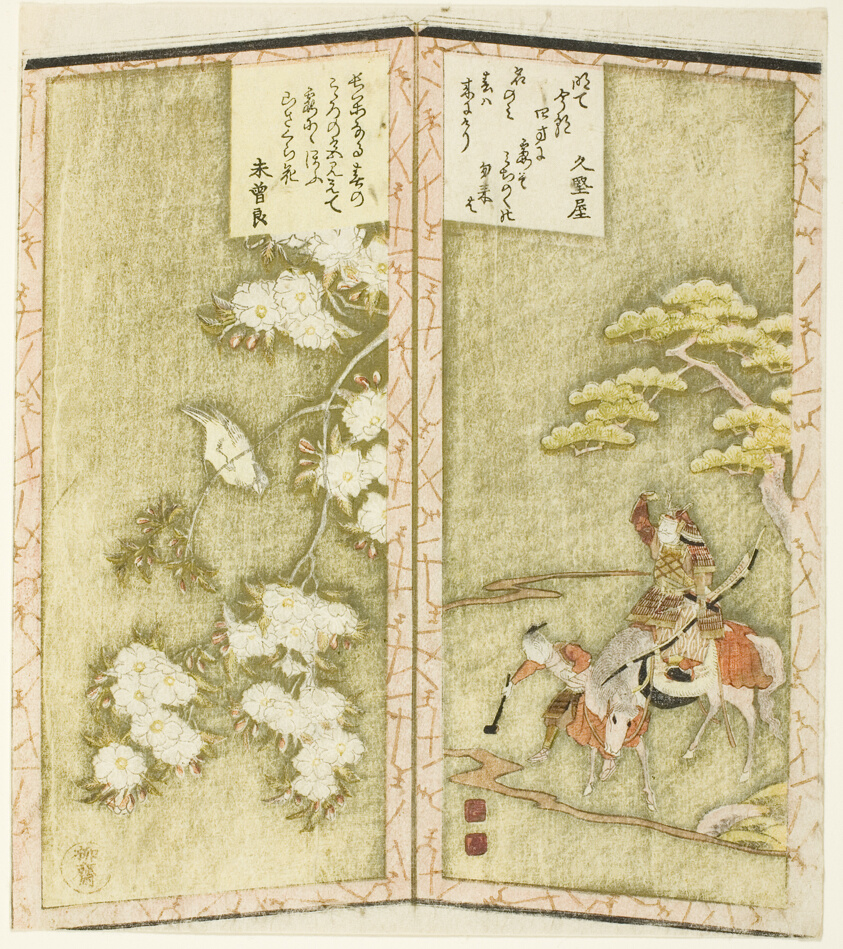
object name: Print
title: Minamoto no Yoshiie on horseback and a bird on a branch, from an untitled hexaptych depicting a pair of folding screens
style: Japanese (culture or style)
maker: Ryuryukyo Shinsai (Japanese, c. 1764-1820)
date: c. 1825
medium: Color woodblock print; sheet from shikishiban hexaptych, surimono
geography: Japan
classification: woodblock print; print; asian art